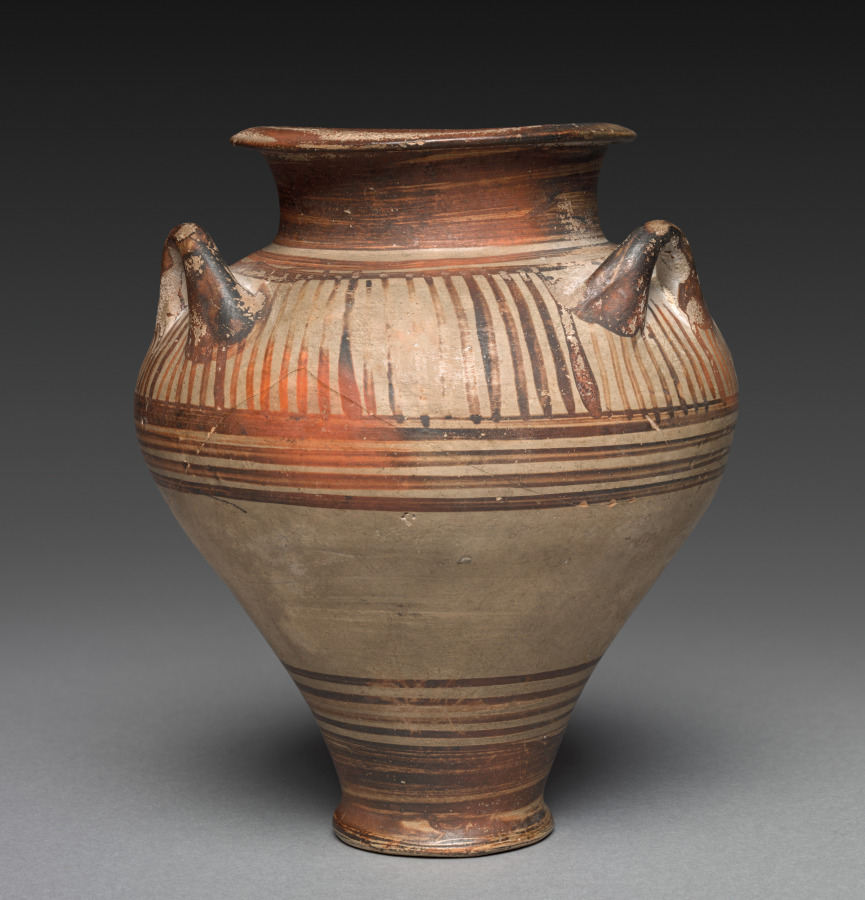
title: Three Handled Jar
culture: Cyprus, late Helladic III A1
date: c. 3200–c. 1050 BCE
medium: ceramic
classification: Ceramic